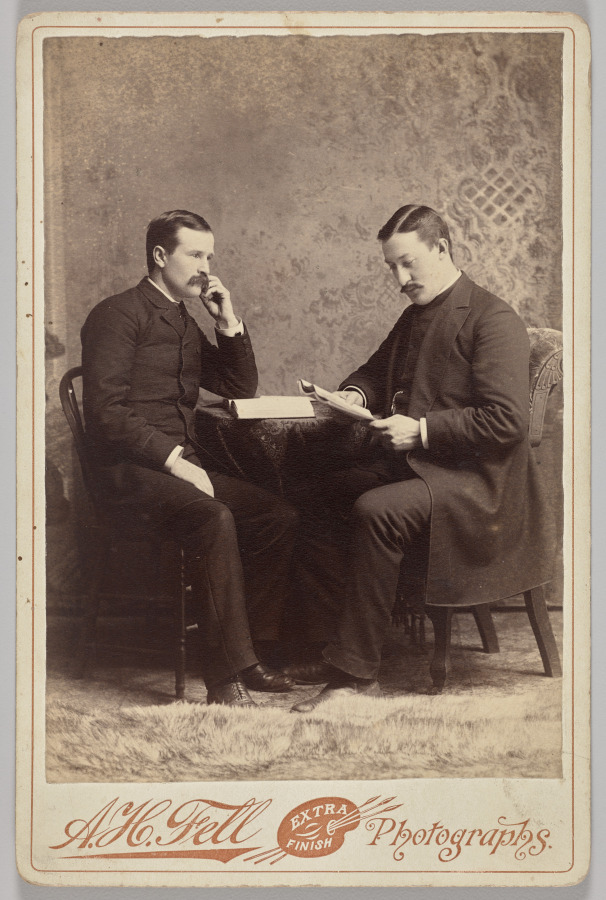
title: Untitled (seated portrait of two men, one with a book, the other reading a magazine)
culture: America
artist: A.H. Fell (American, 19th century)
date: 1880s-1890s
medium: albumen print, cabinet card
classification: Photograph